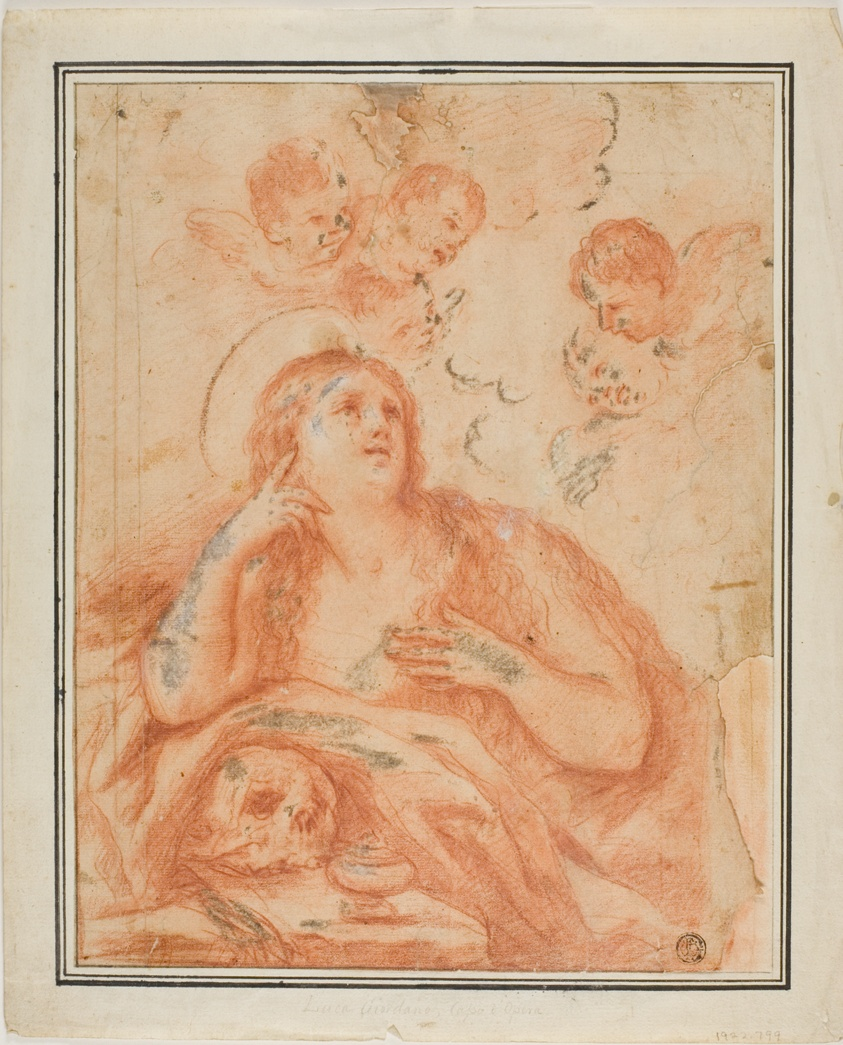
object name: Drawing and Watercolor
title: Penitent Magdalene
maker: Attributed to Sebastiano Conca; Italian, 1680-1764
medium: Red chalk heightened with lead white (discolored) on tan laid paper, laid down on ivory laid paper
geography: Italy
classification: chalk; drawings (visual works); prints and drawing